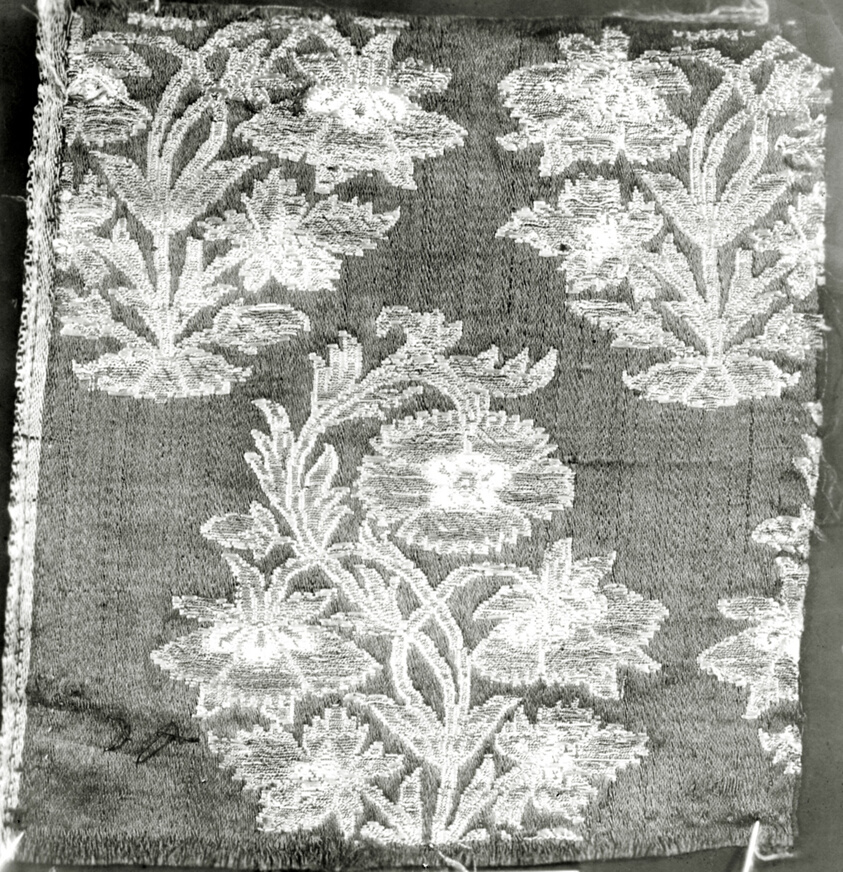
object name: Textile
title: Square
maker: Iran (Persia, Kashan)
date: 1801/ 25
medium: Brocaded plain compound satin, silk and gold wound on yellow silk core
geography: Iran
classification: textile; weaving